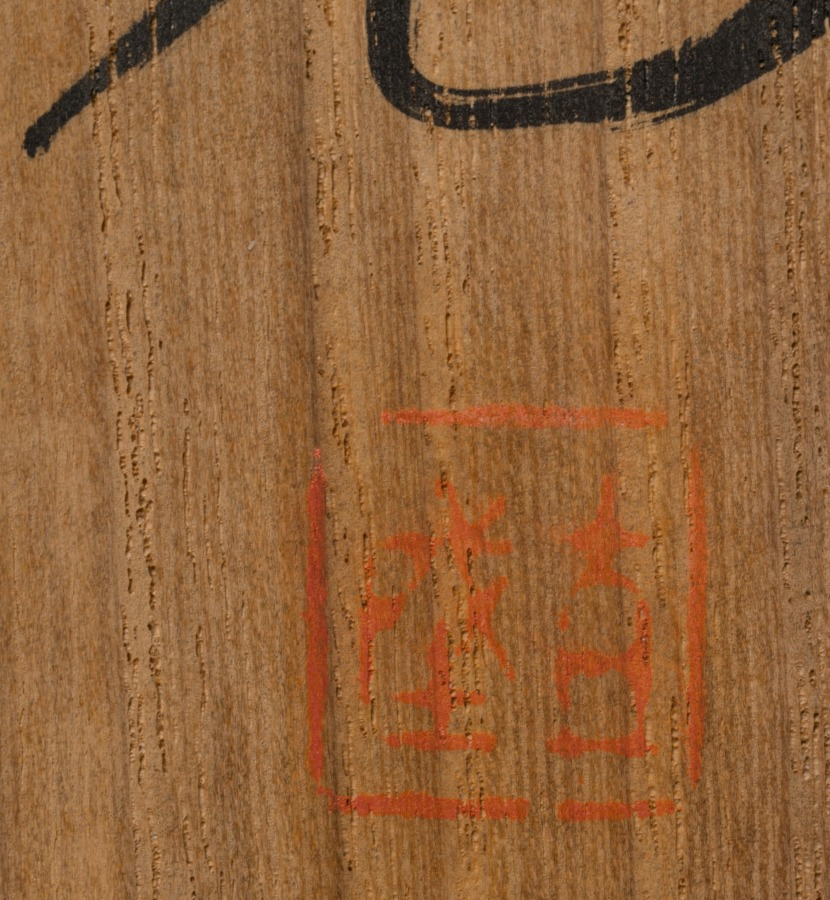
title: Needlefish (Yagara)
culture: Japan, Edo period (1615–1868)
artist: Nakajima Raishō (Japanese, 1796–1871)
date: 1870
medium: hanging scroll; ink and color on paper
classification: Painting